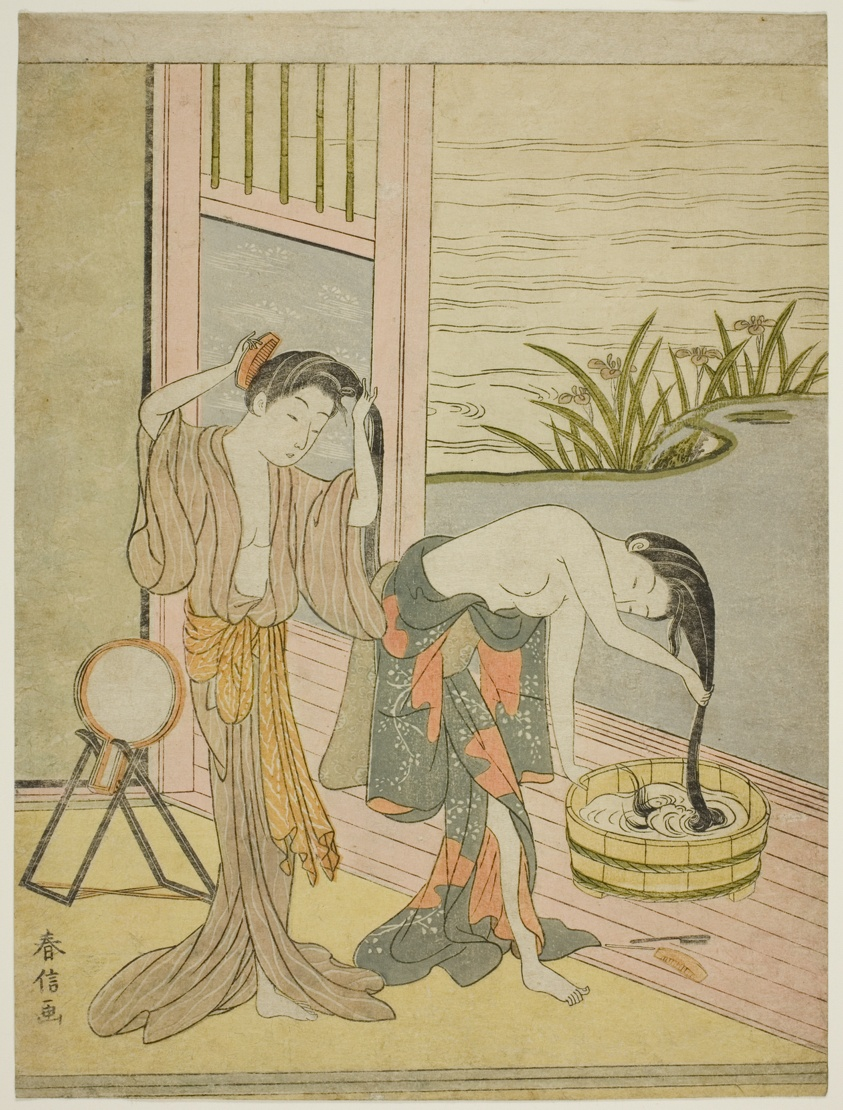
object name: Print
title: Two Women Washing Their Hair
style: Japanese (culture or style)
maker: Suzuki Harunobu 鈴木 春信; Japanese, 1725 (?)-1770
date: c. 1767/68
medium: Color woodblock print; chuban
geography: Japan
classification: woodblock print; print; asian art